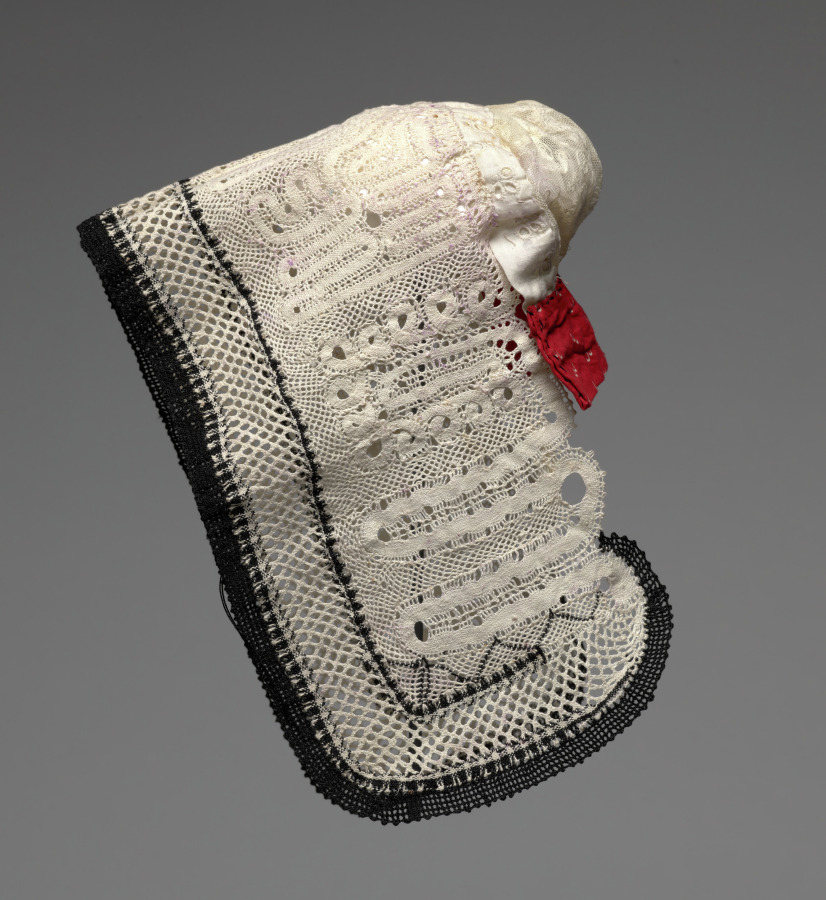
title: Lace Cap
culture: Hungary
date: 1800s(?)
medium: Cotton: bobbin lace and machine-made lace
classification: Lace